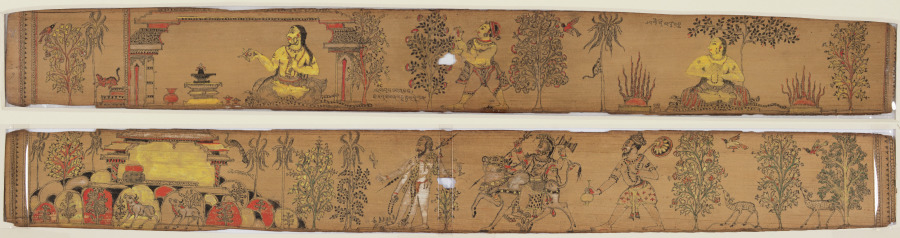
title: A Prince Performs Austerities (recto); Shiva and His Followers Return to Mount Kailash (verso), from a Romance of Chandrabhanu and Lavanyavati of Upendra Bhanja (1670–1740)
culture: Eastern India, Odisha (formerly Orissa)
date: 1700s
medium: gum tempera and lampblack on palm leaf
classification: Painting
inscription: kailasakandara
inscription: 1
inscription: e pancagni gartta acchi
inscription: e rajāpua tapasā kari sivapūjā kari acchi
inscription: agni jalum accchi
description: In this illustration from the beginning of a popular romance, a prince performed intense austerities and devotions to the Shiva linga in order to obtain a divine woman. He practices yoga surrounded by fires during the hot season and wanders unsheltered during monsoon, as seen on the recto. On the verso, Shiva has answered his prayers and returns home to his "cave on Mount Kailash," as stated in the inscription.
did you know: There is a three-legged yogi on the verso.